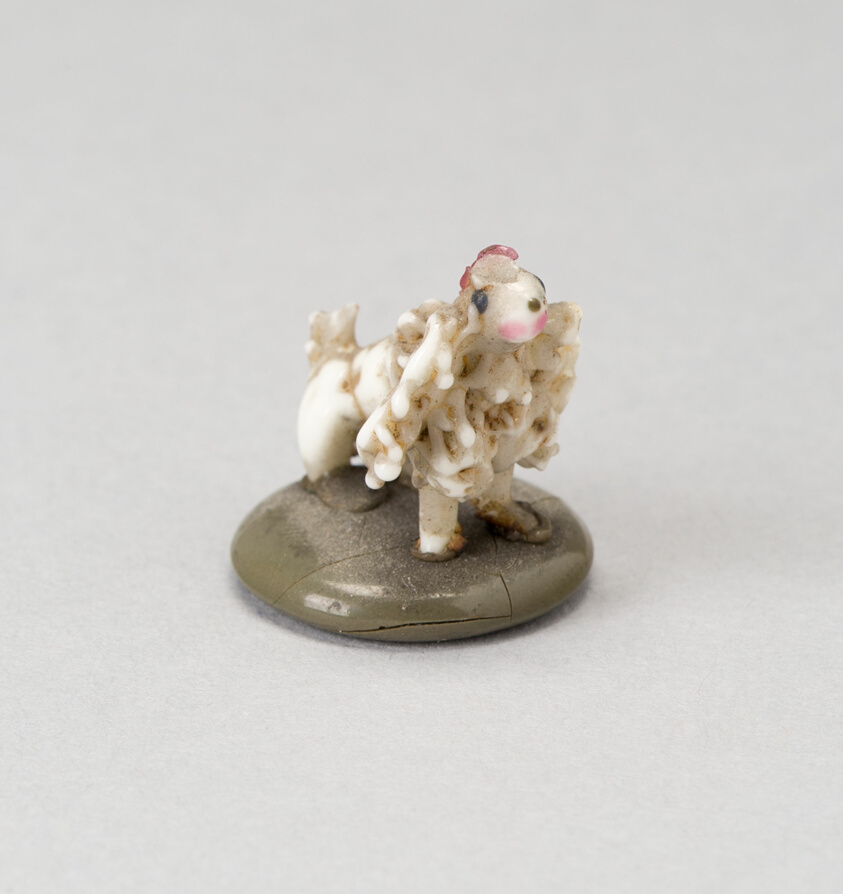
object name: Glass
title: Dog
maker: Nevers, France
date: 18th century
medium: Glass; lampwork (verre de Nevers), metal armature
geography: France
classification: glass; miniature; decorative object/ornament; european decorative arts